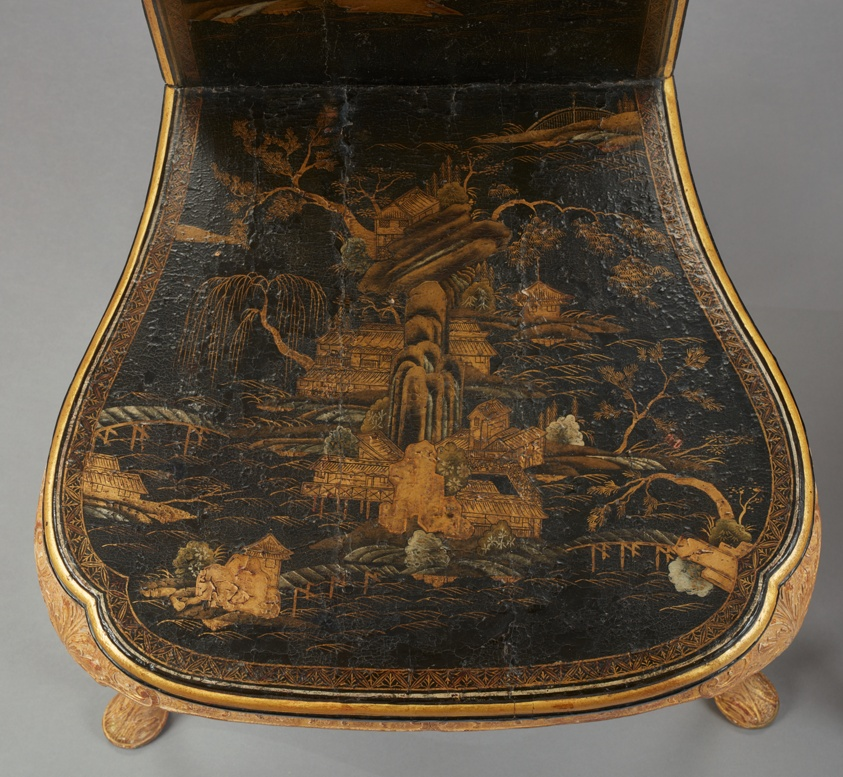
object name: Furniture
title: Pair of Hall Chairs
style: Baroque, chinoiserie, georgian, 18th Century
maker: China (lacquer back and seat panels) and England (frame)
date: 1720-30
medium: Frames: gilt gesso on beechwood; Backs and seats: lacquered and gilt Chinese softwood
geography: England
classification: chair; furniture; seating; european decorative arts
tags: landscapes, rocks